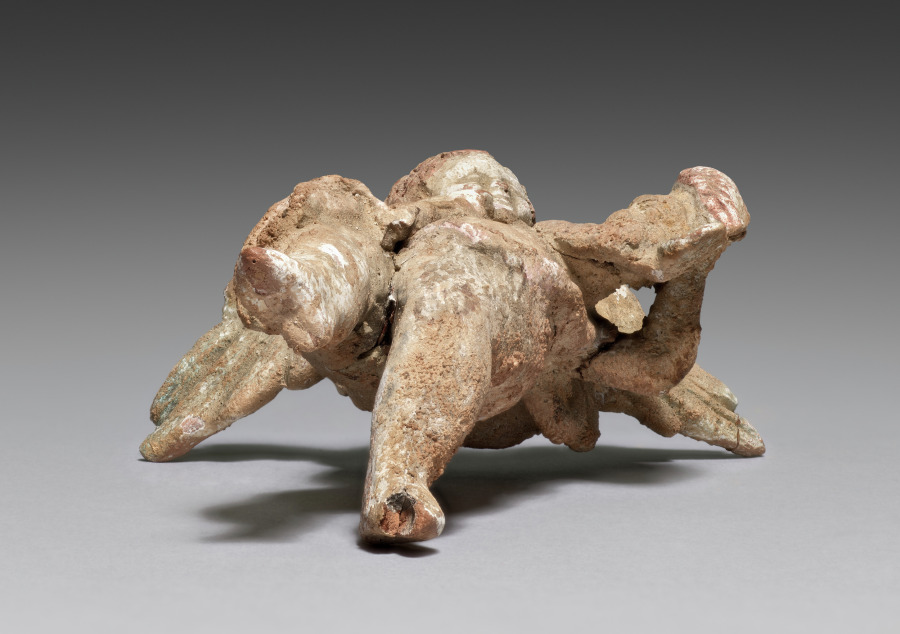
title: Figurine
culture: Greece, Myrina, Hellenistic period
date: 300–100 BCE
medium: terracotta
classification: Sculpture